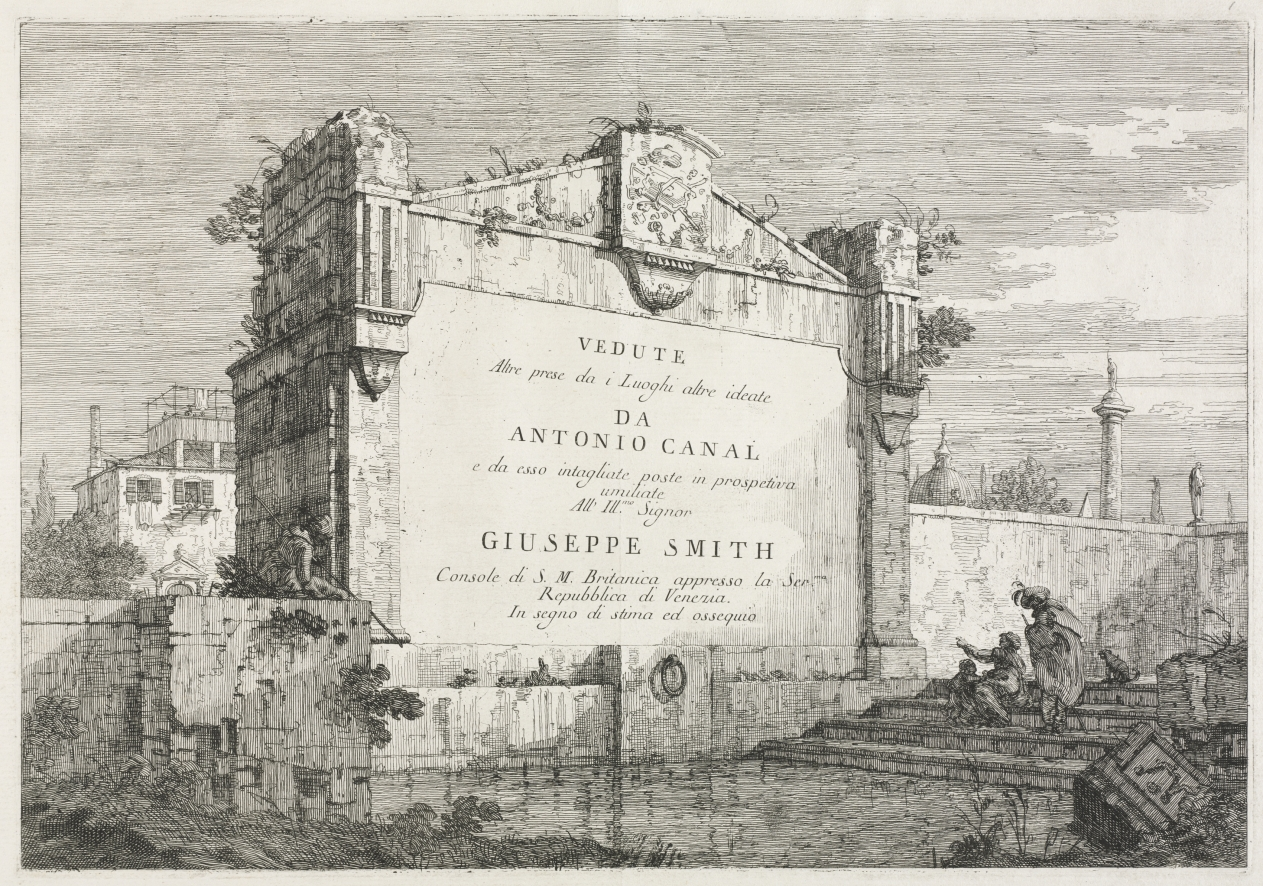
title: Views: Title Page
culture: Italy, Venice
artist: Antonio Canaletto (Italian, 1697–1768)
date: 1735–1746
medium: etching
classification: Print